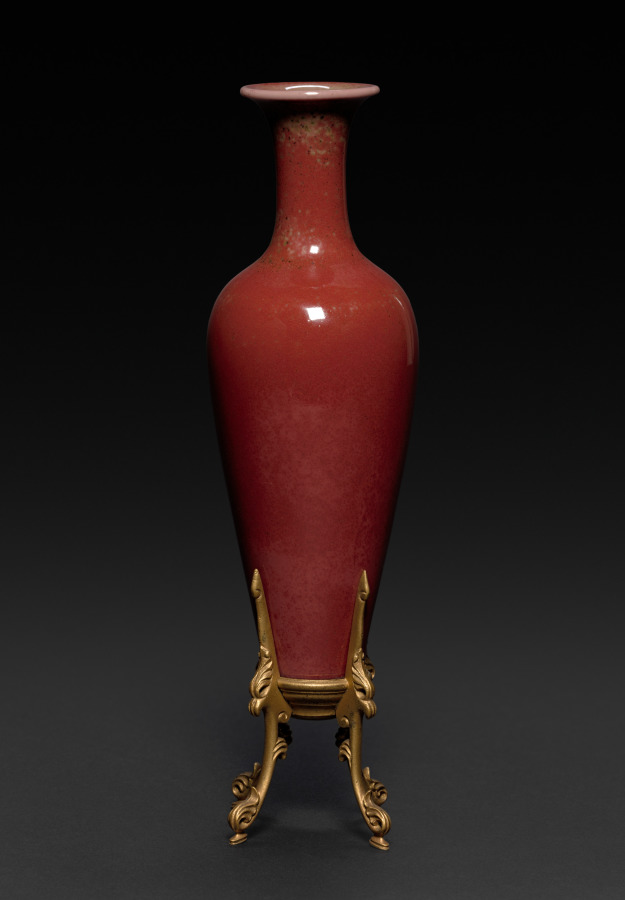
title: Bottle with Peach Bloom Glaze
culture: China, Qing dynasty (1644-1911), Kangxi reign (1661-1722)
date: 1662–1722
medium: porcelain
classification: Ceramic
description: The "peach-bloom" glaze developed during the Kangxi era has also been described as "drunken with beauty." Technical achievements were transcended with aesthetic associations, revealing the greatest sensitivity to all things beautiful in nature.